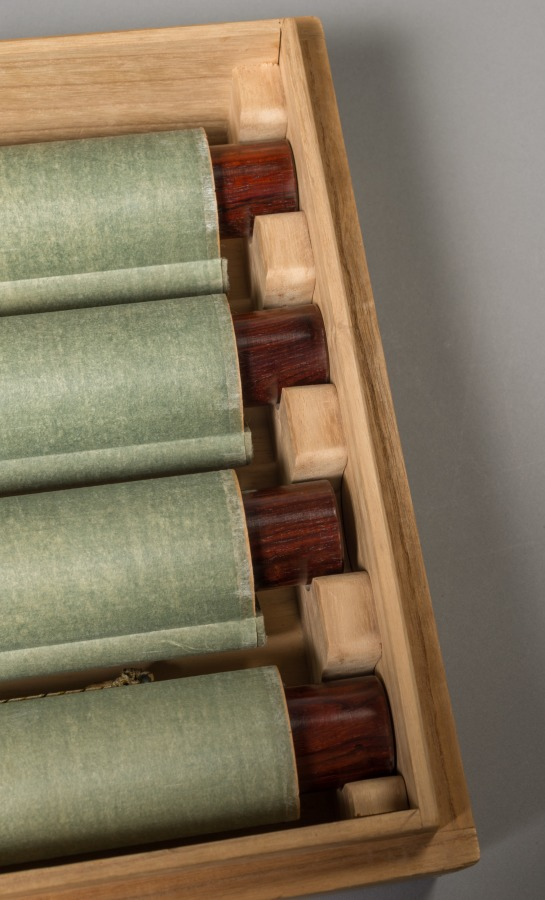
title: Puppies, Sparrows, and Chrysanthemums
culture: Japan, Edo period (1615–1868)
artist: Nagasawa Rosetsu (Japanese, 1754–1799)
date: c. 1792–94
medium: Fusuma panels remounted as hanging scrolls; ink and slight color on paper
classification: Painting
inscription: Inscription: 平安・芦雪寫意; transliteration: Heian, Rosetsu sha'i; sealed: 魚; seal transliteration: Gyo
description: These paintings were originally mounted as sliding doors (fusuma) used inside a building. The circular areas on the paintings’ paper surfaces are traces of the former positions of the door pulls (hikite). A flock of sparrows gathers on a trellis supporting flowering chrysanthemum. Below is a litter of puppies, some cavorting, others napping. The tender story created by the curious puppy peering up and tilting its head to listen to the bird’s insistent call in the leftmost part of the composition is characteristic of Nagasawa Rosetsu’s paintings, which often use animals to illustrate the human condition.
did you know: The round circular areas in the paintings' paper surfaces, each surrounded by a dark halo of embedded dirt and finger oils, indicate the location of the door "catches."